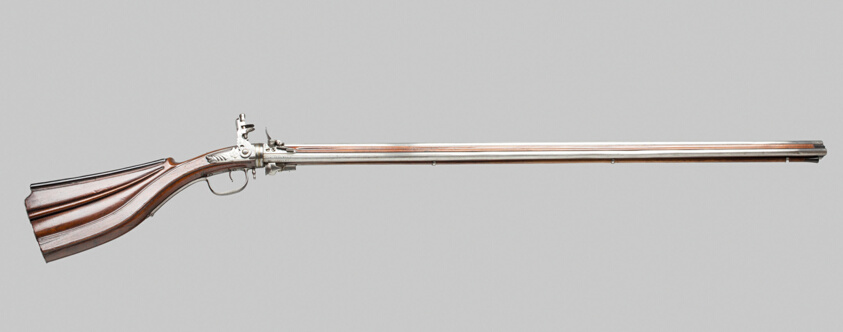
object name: Arms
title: Triple-Barrel Revolving Flintlock Fowling Piece from the Gun Cabinet of the Princes of Liechtenstein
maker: Gunsmith: Tilman Keucks (Dutch)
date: c. 1650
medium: Steel, brass, walnut, ebony, and horn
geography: Germany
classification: firearm-long gun; arms; arms and armor